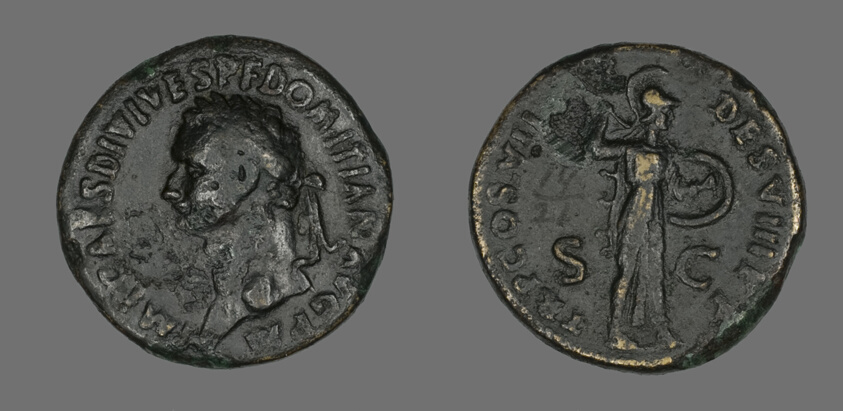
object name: Coin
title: Sestertius (Coin) Portraying Emperor Domitian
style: roman (ancient, style or period)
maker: Roman, minted in Rome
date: 81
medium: Bronze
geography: Roman Empire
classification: coin; ancient art